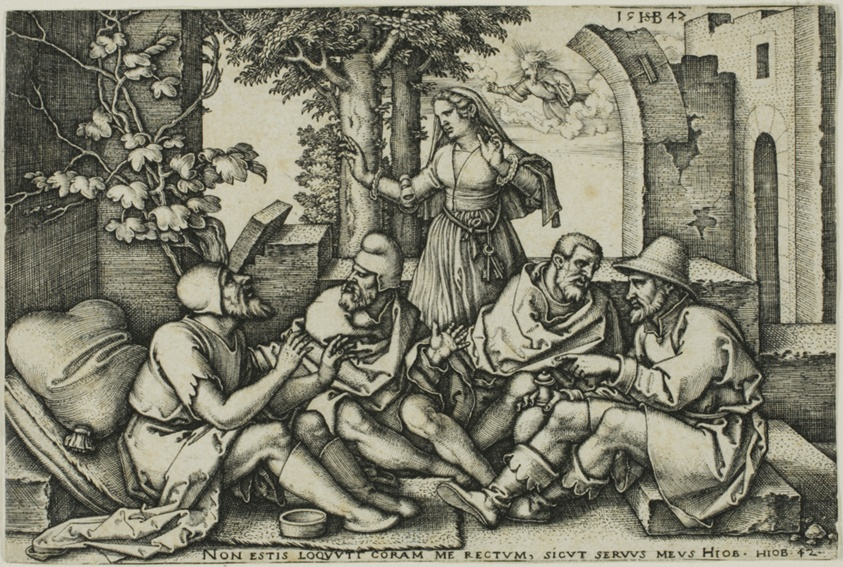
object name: Print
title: Job Conversing with His Friends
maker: Sebald Beham; German, 1500-1550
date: 1547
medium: Engraving in black on ivory laid paper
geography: Germany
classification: engraving; print; prints and drawing